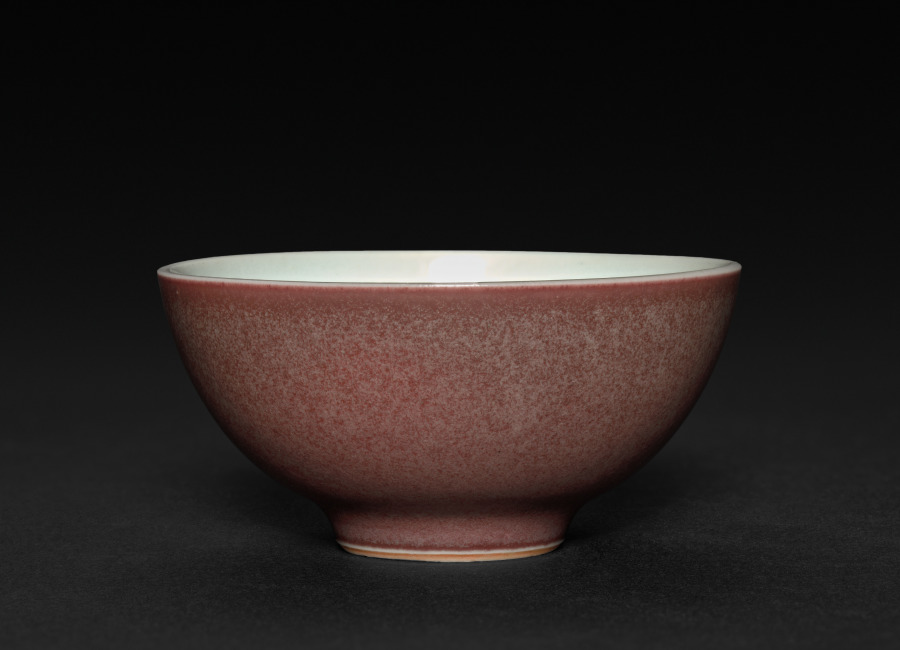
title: Cup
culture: China, Jiangxi province, Jingdezhen kilns, Qing dynasty (1644-1911)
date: 1700s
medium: porcelain with mottled blue glaze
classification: Ceramic